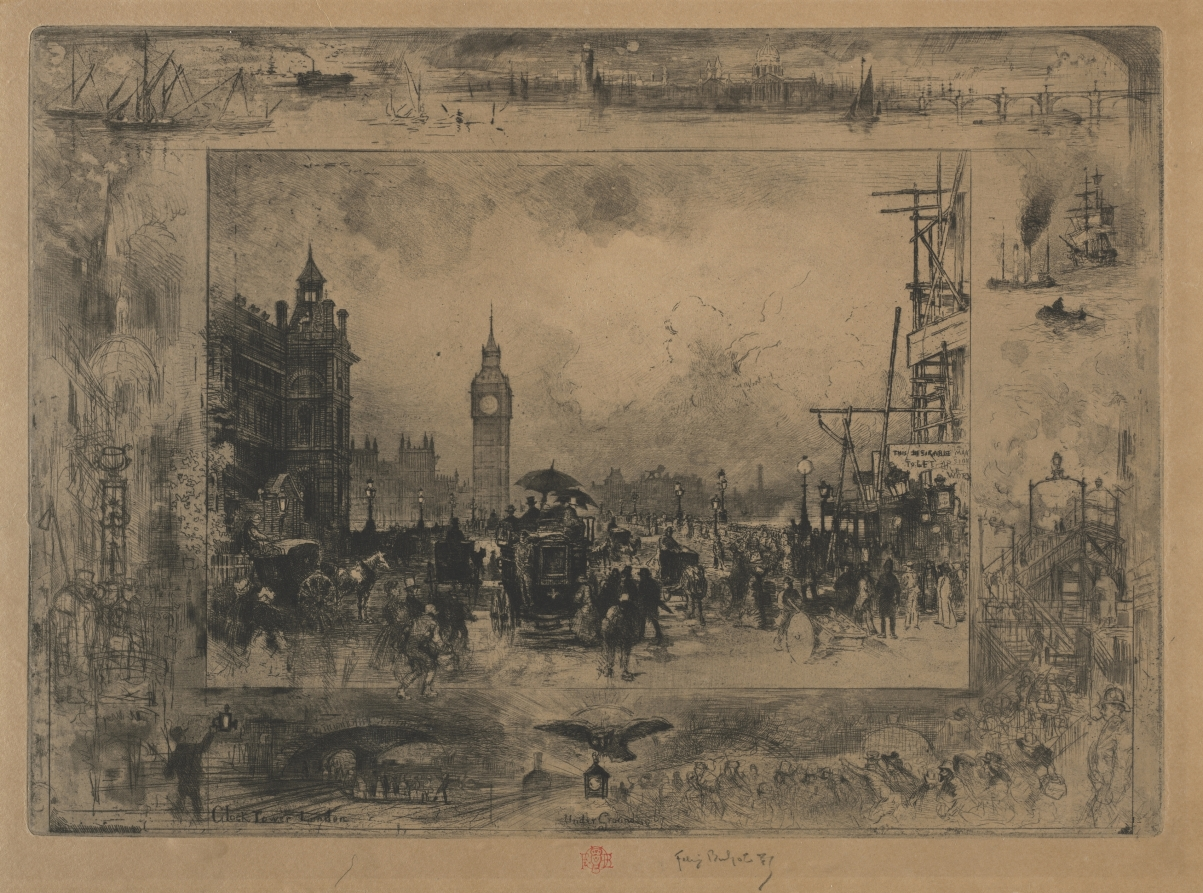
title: Westminster Bridge, or Westminster Tower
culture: France, 19th century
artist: Félix Hilaire Buhot (French, 1847–1898)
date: 1884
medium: etching, aquatint, drypoint and roulette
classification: Print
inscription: signed, lower center, in graphite: Felix Buhot; lower left, in plate: CLock Tower London; lower center, in plate: Under Ground